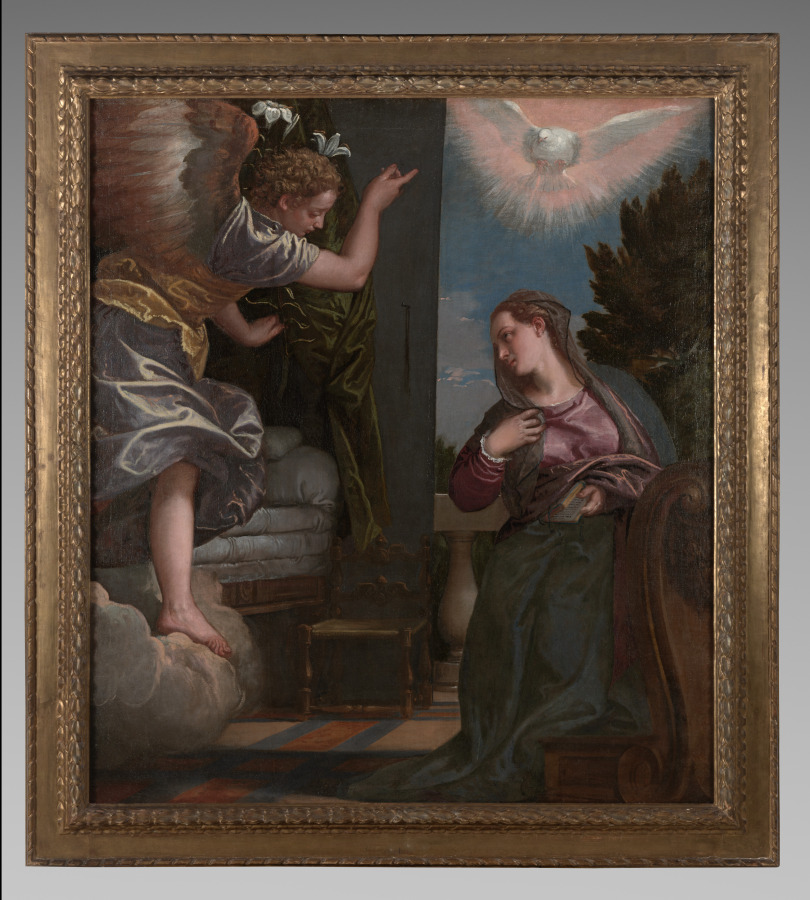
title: The Annunciation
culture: Italy, 16th century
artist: Paolo Veronese (Italian, 1528–1588)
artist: and Workshop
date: c. 1580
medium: oil on canvas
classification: Painting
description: Although Veronese is best known for his large-scale, pageant-like presentations, here the artist has taken the narrative of the Annunciation (the announcement of the angel Gabriel to the Virgin Mary that she would conceive and bear a son) and compressed the figures close to one another, creating a startling intimacy. According to a tradition established by the medieval writer Saint Bernard, Mary has been reading from the Old Testament prophecy of Isaiah (7:14), "A young woman is with child and she will bear a son."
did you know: The white lilies held by Gabriel are a symbol of Mary's purity and innocence, often appearing in depictions of the Annunciation.